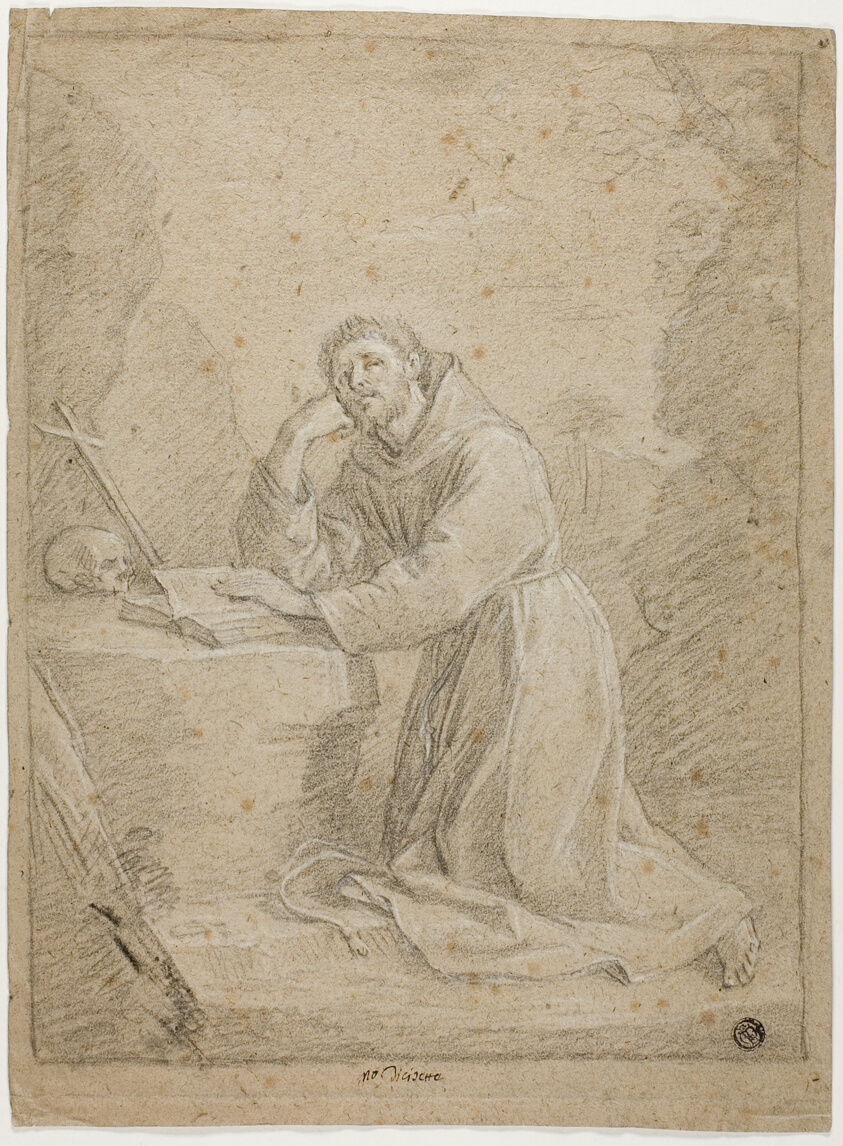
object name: Drawing and Watercolor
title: Saint Francis of Assisi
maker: Unknown Artist; Italian, 17th century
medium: Black chalk, heightened with white chalk, on brown laid paper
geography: Italy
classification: graphite; drawings (visual works); prints and drawing